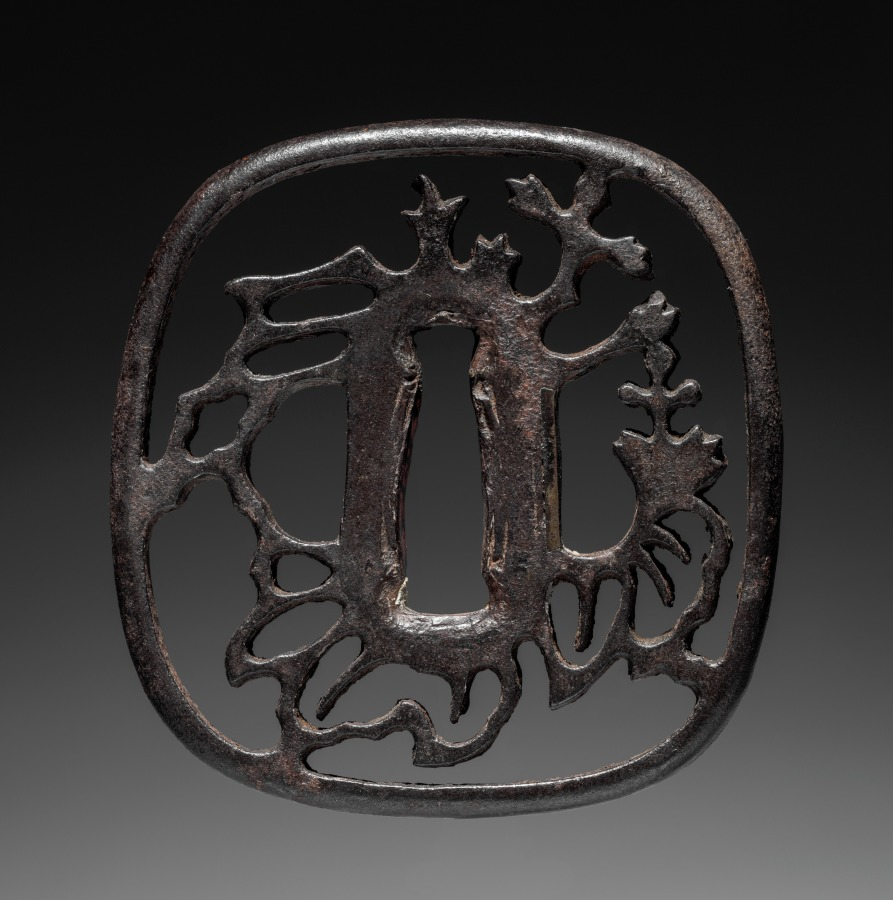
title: Sword Guard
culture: Japan, Edo period (1615–1868)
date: 1615–1868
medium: iron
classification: Arms and Armor